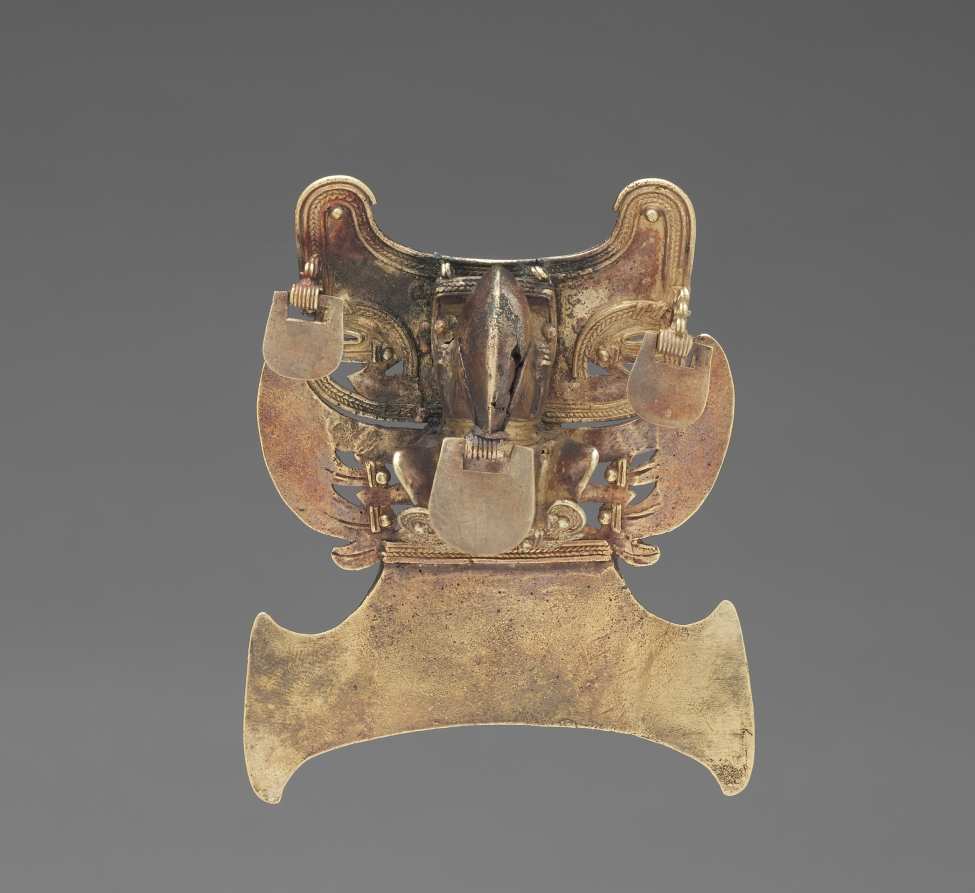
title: Bird Pendant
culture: Colombia, Tairona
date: 900–1550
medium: cast gold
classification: Metalwork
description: Tairona-style pendants are among the most spectacular of all ancient American gold ornaments, in part because of the detail achieved with lost-wax casting. The traits of the figure pendant include a lower lip ornament and a headdress in which two bats hang upside down. Although called caciques (chieftains), that is, ruler portraits, the meaning of such figures is not well understood. Bird imagery was important in the isthmian region in ancient times and remains so today. For instance, among the modern Bribri of Costa Rica, the principal creator deity (Sibo) takes the form of a buzzard or kite who wears a collar. Collars are standard features of ancient bird pendants, like the one shown here.